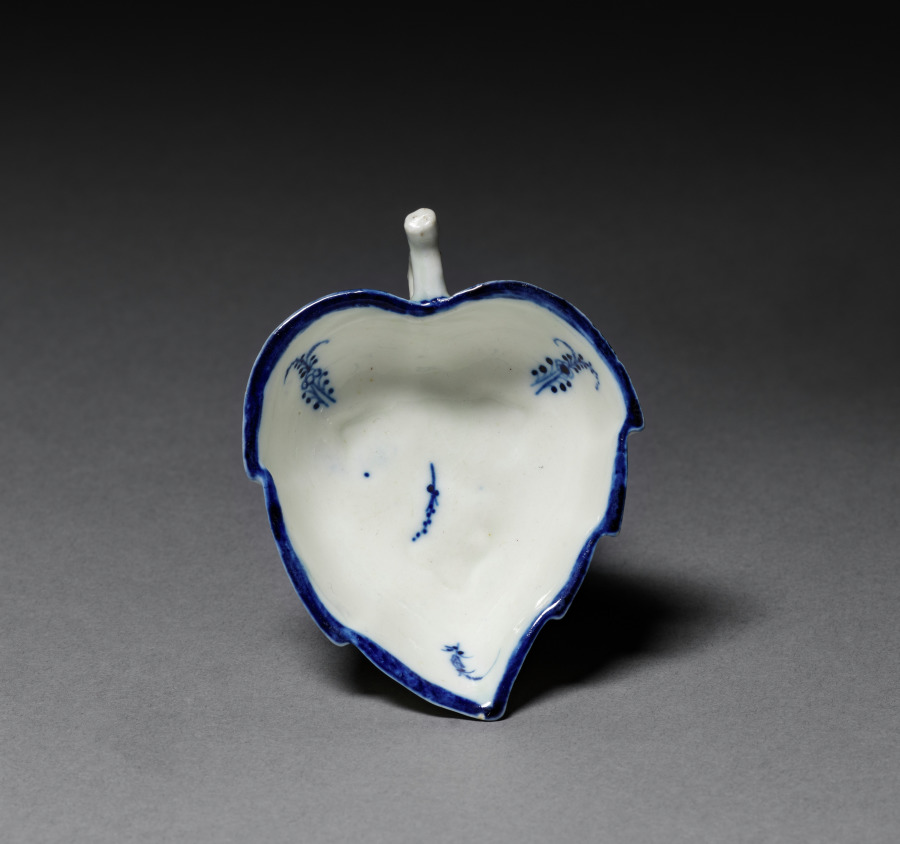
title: Leaf Dish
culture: France, 18th century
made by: Arras Porcelain Factory (French)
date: c. 1780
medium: soft-paste porcelain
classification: Ceramic